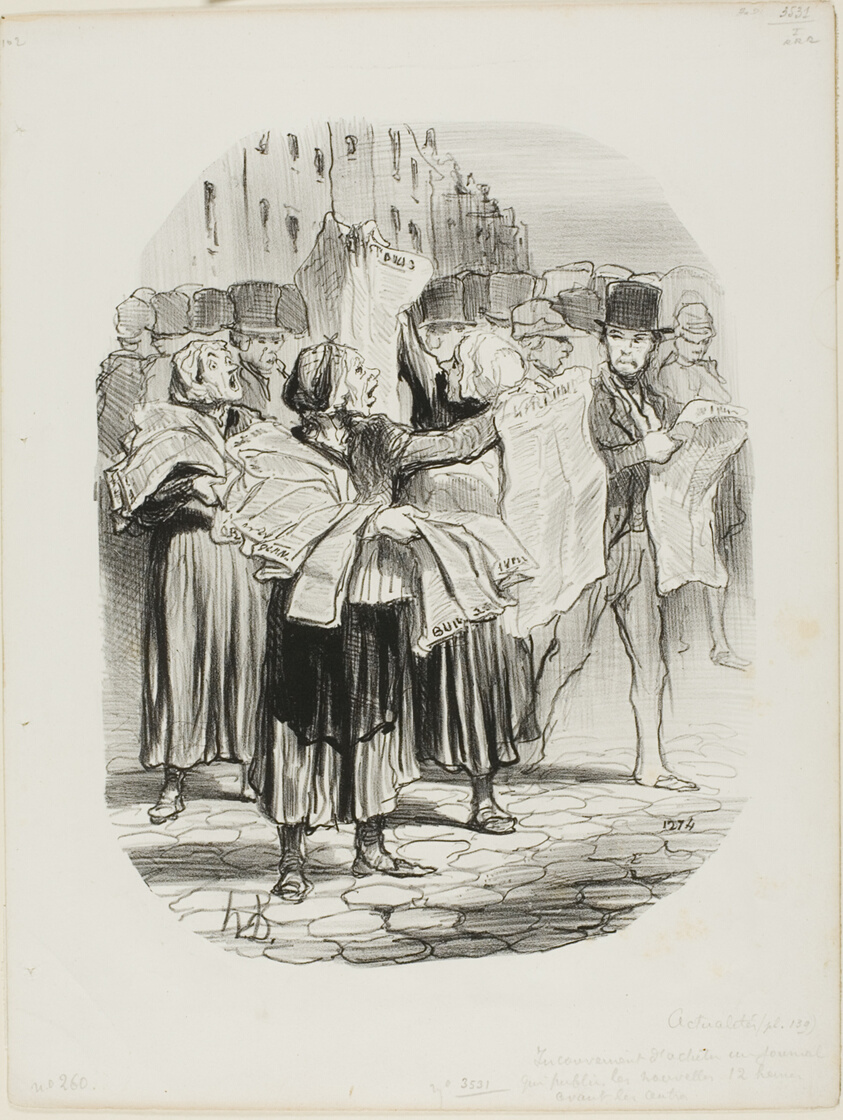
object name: Print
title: The Disadvantage of Buying a Newspaper That is Publishing the News Twelve Hours Before the others. “- How come I buy your paper and cannot find the news of today? - Sir, today's news was in yesterday's paper,” plate 139 from Actualités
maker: Honoré Victorin Daumier; French, 1808-1879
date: 1848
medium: Lithograph in black on white wove paper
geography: France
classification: lithograph; print; prints and drawing